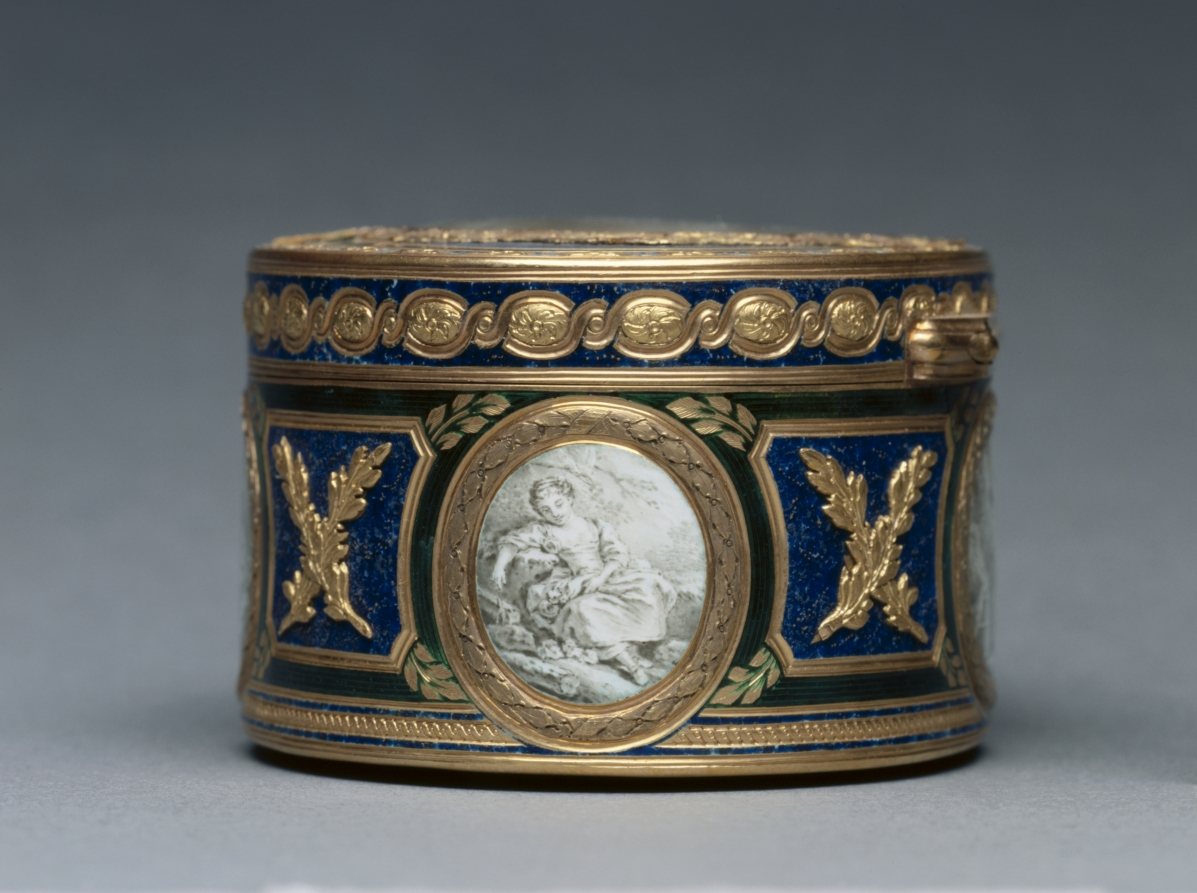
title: Snuff Box (Tabatière) with Portrait of Marie Antoinette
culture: France, 18th century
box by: Pierre-François-Mathis de Beaulieu (French)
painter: François Dumont (French, 1751–1831)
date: 1768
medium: watercolor on ivory in a gold and enamel box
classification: Enamel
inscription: [Maker's mark of Pierre-François-Mathis de Beaulieu, master goldsmith in 1768, inside cover]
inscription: [Charge mark of Jean-Jacques Prévot, 1762-1768, inside cover]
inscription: [Warden's mark of Paris, 1768-1769, inside cover]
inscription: [Discharge mark of Julien Alaterre, Paris, 1768-1774, on neck at right]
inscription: [Inside box, the letter]: "F"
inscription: [On bezel at left, engraved number]: "627"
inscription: [On front of bezel, engraved signature]: "Ve Georges Beaulieu à Paris"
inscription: [On right of miniature portrait, the letter]: "D"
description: This box was created through the collaboration of two skilled and well-known artisans of the period, master goldsmith Pierre-François-Mathis de Beaulieu and celebrated miniature painter François Dumont. The portrait of Marie Antoinette on the box's lid is painted in Dumont’s own style while those on the sides and bottom of the box take inspiration from the work of painter François Boucher, known for his pastoral scenes in the Rococo style.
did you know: Marie Antoinette, queen consort of French King Louis XVI and great patron of the decorative arts, was executed in 1793 at the end of the French Revolution.